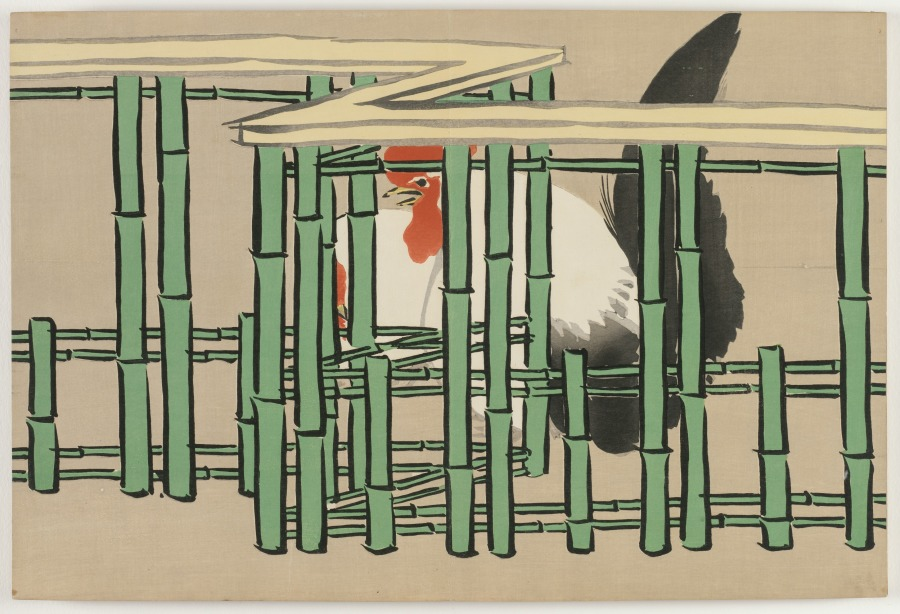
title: Flowers of a Hundred Worlds (Momoyogusa): Rooster (Chabo)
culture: Japan, Meiji period (1868–1912)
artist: Kamisaka Sekka (Japanese, 1866–1942)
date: 1909–10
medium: color woodcuts with gold and silver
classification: Bound Volume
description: This print from a set of three woodblock printed albums displays the graphic design prowess of Kamisaka Sekka. The images were first distributed one by one to subscribers to the series but later were reissued in bound form, like this book, for mass consumers. Each print features a vignette taken from nature or Japanese literature. Many of the scenes have a long history in Japan, originating in the 900s or 1000s and having been interpreted by all manner of artists since that time. Sekka’s selections hew closely to precedents from the Rinpa style originated by painter Tawaraya Sōtatsu (c. 1570–c. 1640) and calligrapher Hon’ami Kōetsu (1558–1637).